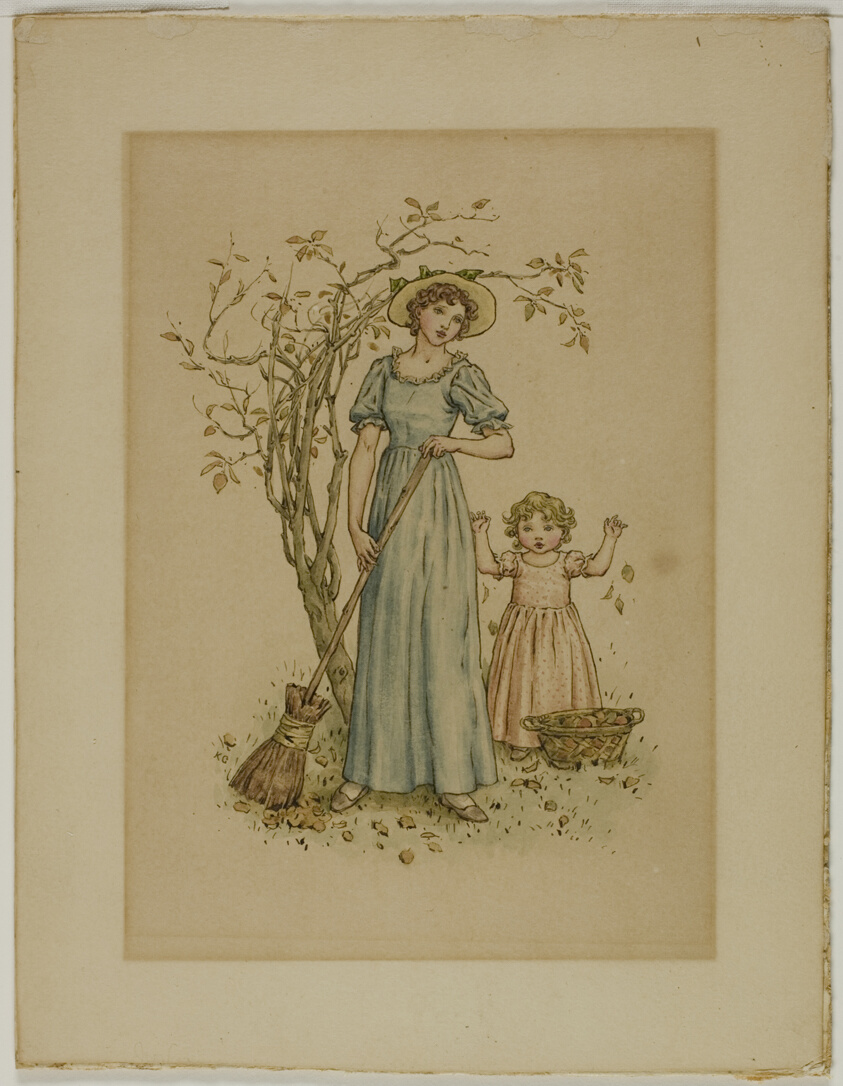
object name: Drawing and Watercolor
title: Woman with Broom and Little Girl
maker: Kate Greenaway (English, 1846-1901)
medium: Pen and brown ink and watercolor on cream wove paper (discolored to tan), perimeter mounted onto cream wood-pulp laminate board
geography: England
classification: watercolor; drawings (visual works); prints and drawing